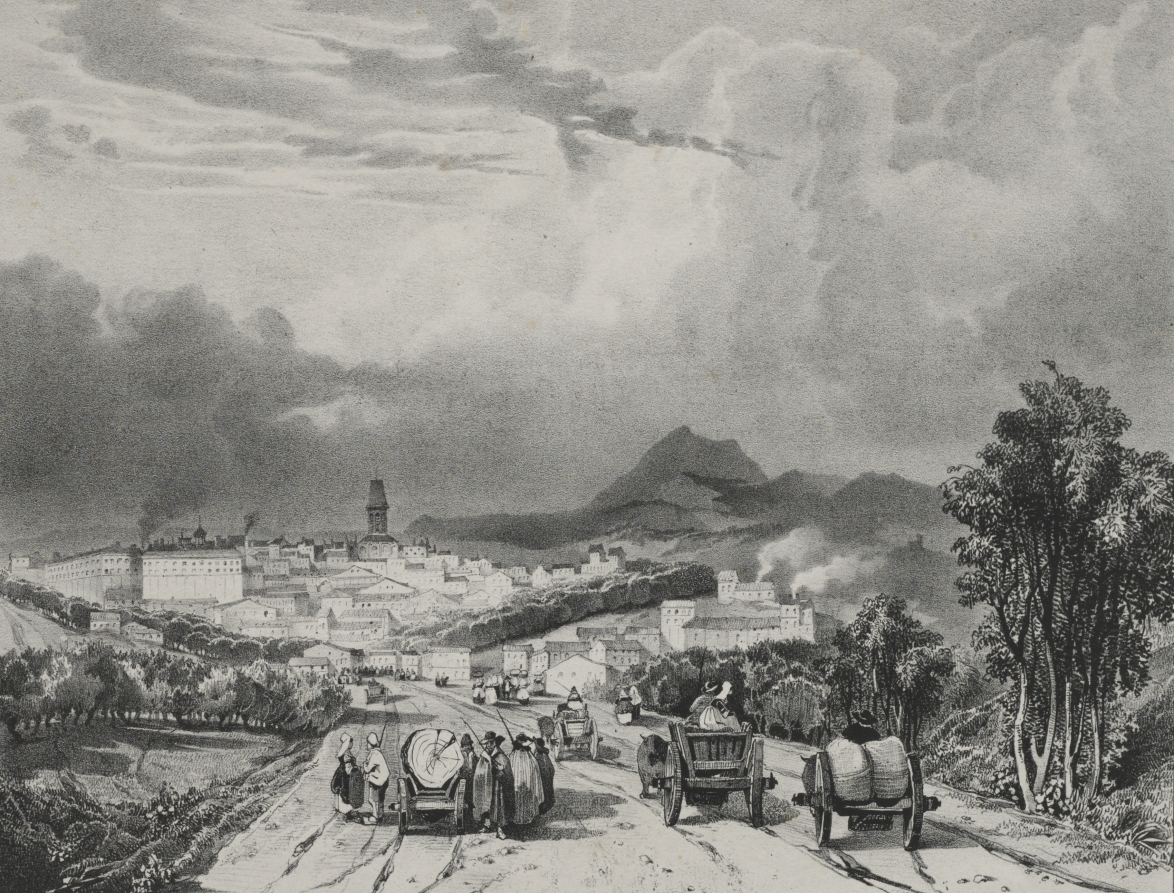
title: Vue generale de Riom, Auvergne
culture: France, 19th century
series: Voyages pittoresques et romantique dans l'ancienne France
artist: Adrien Dauzats (French, 1804–1868)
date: 1829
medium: lithograph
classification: Print